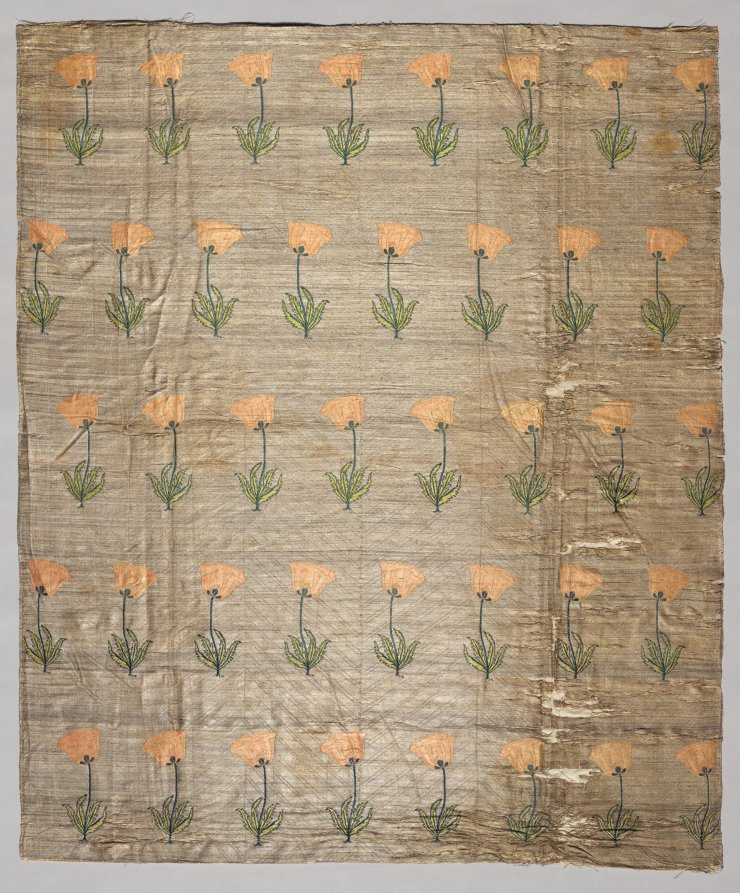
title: Textile with field of poppies on a golden ground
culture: Iran, Safavid period (1501–1722)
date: 1600–1750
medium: silk and gilt-metal thread: twill weave with supplementary weft, stamped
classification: Textile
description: Trade in textiles flourished between India and Iran. Courtly consumers from the neighboring Mughal and Safavid dynasties admired the products of both regions. The subtle chevrons set off rows of poppies that sway in alternating directions, lending a gentle liveliness to the overall pattern. Peach and green silk threads interlace to create each poppy in a technique that uses discontinuous wefts and allows for a smooth surface finish to this lightweight textile.